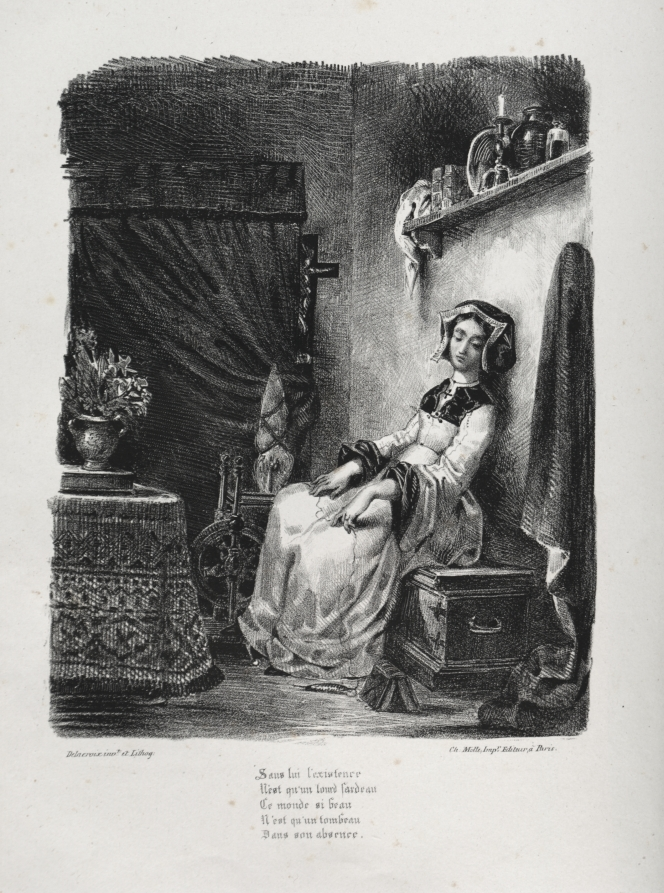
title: Illustrations for Faust: Marguerite with the wheel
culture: France, 19th century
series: Faust: Tragédie de M. de Goethe, translated into French by Albert Stapfer.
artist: Eugène Delacroix (French, 1798–1863)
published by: Chez Ch. Motte, Éditeur, distributed by Chez Sautelet, Libraire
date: 1828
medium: lithograph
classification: Print